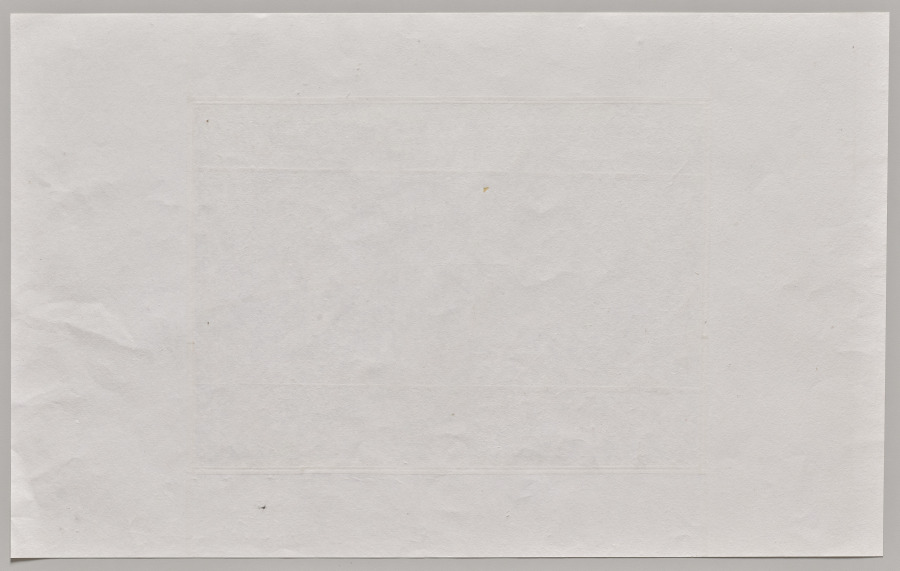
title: A Newly-Cut Print of Illustrations from The Classic of Mountains and Seas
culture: China, Qing dynasty (1644–1911), Jiaqing period (1796–1820)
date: 1796–1820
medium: Polychrome woodblock print; ink and color on paper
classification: Print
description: In the 1600s, printing flourished in such Jiangnan cities as Nanjing, Suzhou, Hangzhou, and Huizhou, evolving from privately enjoyed illustrated books printed in color to more commercialized single-sheet color prints that were hung on walls and became part of the rich urban visual culture.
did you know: Woodblock printing in color reached a height in China in the 1600s to 1700s. The prints were executed by means of sets of separate blocks, each carved to print a different color.